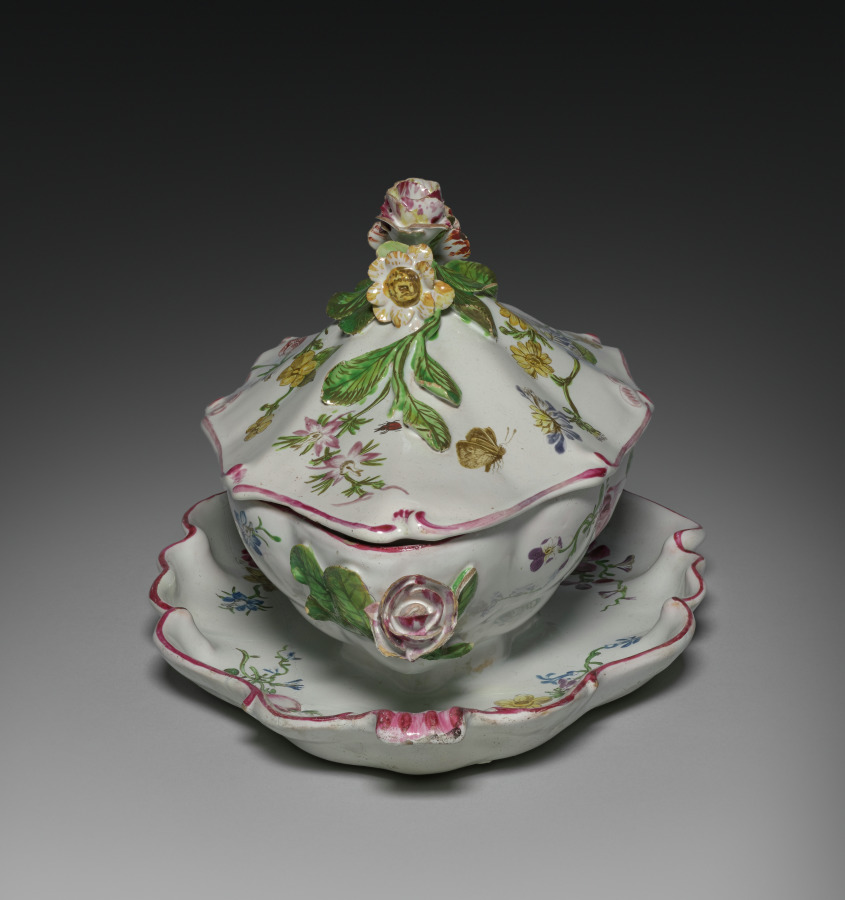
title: Covered Sauce Tureen with Attached Stand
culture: France, Marseilles, 18th century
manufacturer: Veuve Perrin Factory (French)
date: c. 1765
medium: tin-glazed earthenware (faience) with enamel decoration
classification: Ceramic